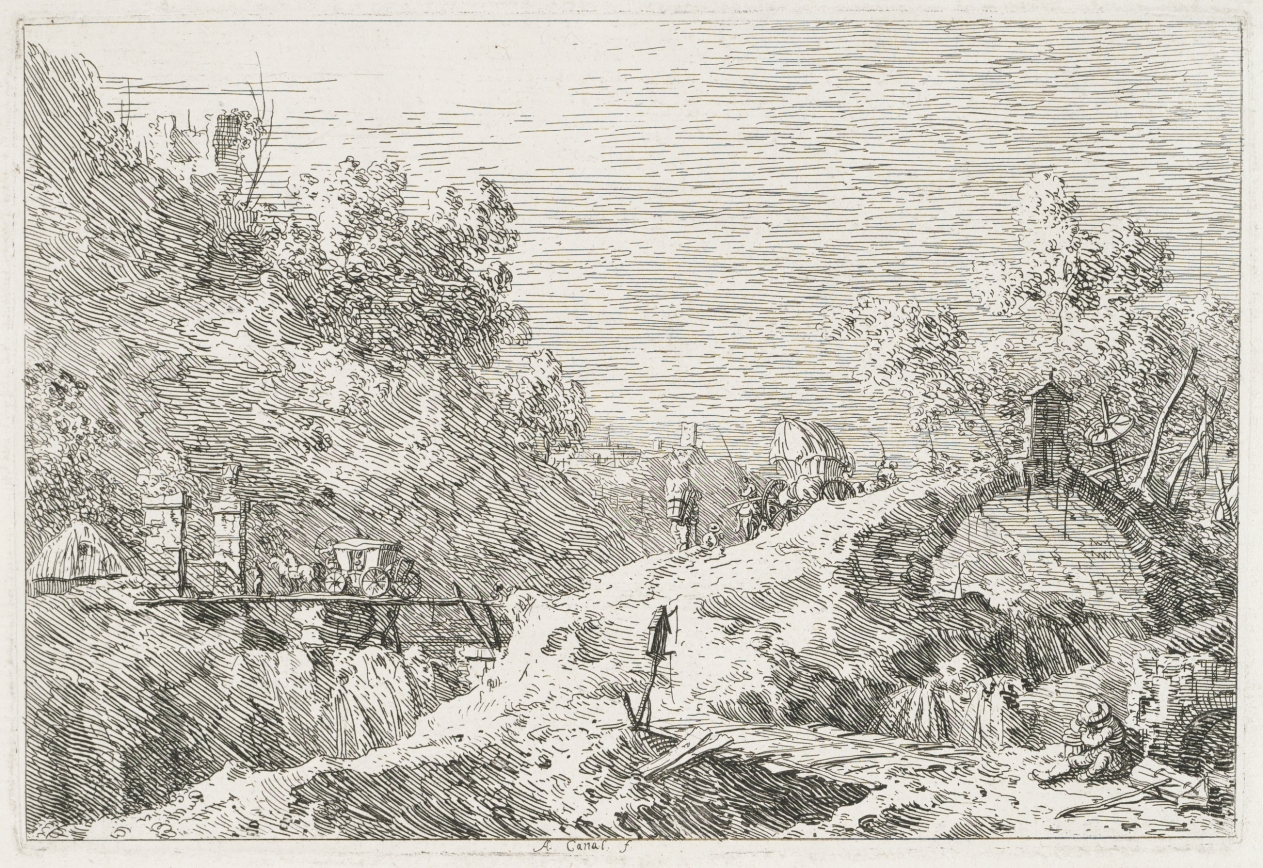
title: Views: Mountain Landscape with Five Bridges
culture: Italy, Venice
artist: Antonio Canaletto (Italian, 1697–1768)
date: 1735–1746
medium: etching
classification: Print